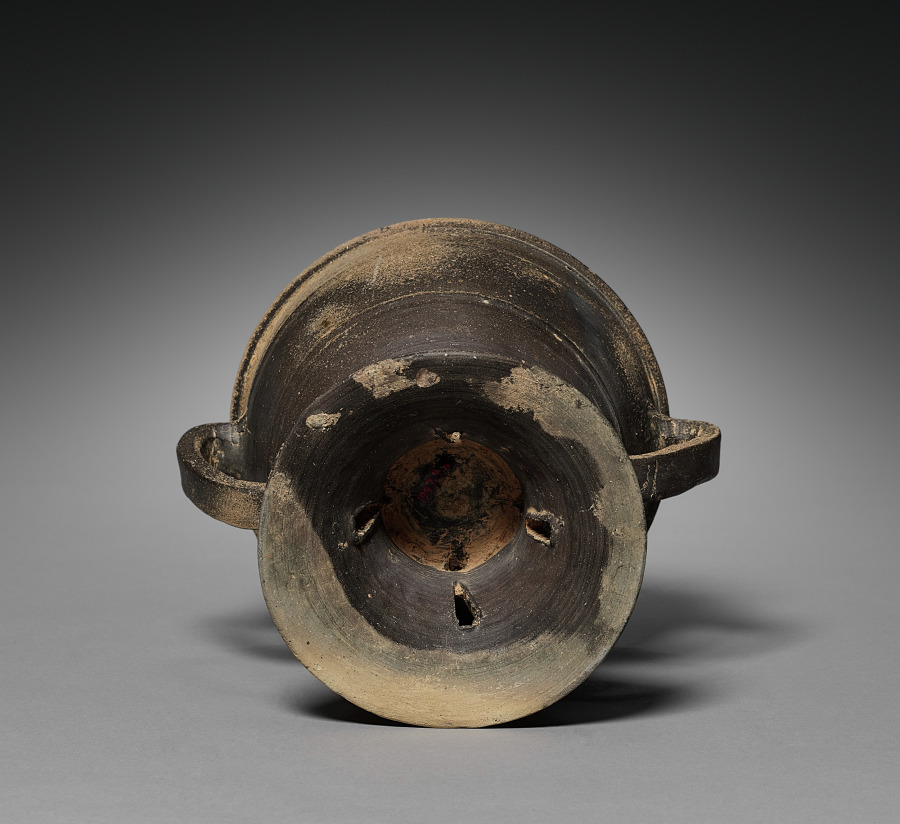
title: Lidded Cup with Strap Handles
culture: Korea, Gaya period (42–562 CE)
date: 300s–400s CE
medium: stoneware with natural ash glaze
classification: Ceramic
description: Pottery vessels with a footed stand such as this one is the earliest known high-fired ware. Its gray color is the result of the reduction of oxygen in the closed kiln chamber. Footed vessels were not for everyday usage, but rather served to present offerings to the deceased.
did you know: A series of triangular cutouts shown on the bottom are standard features of Kaya pottery.